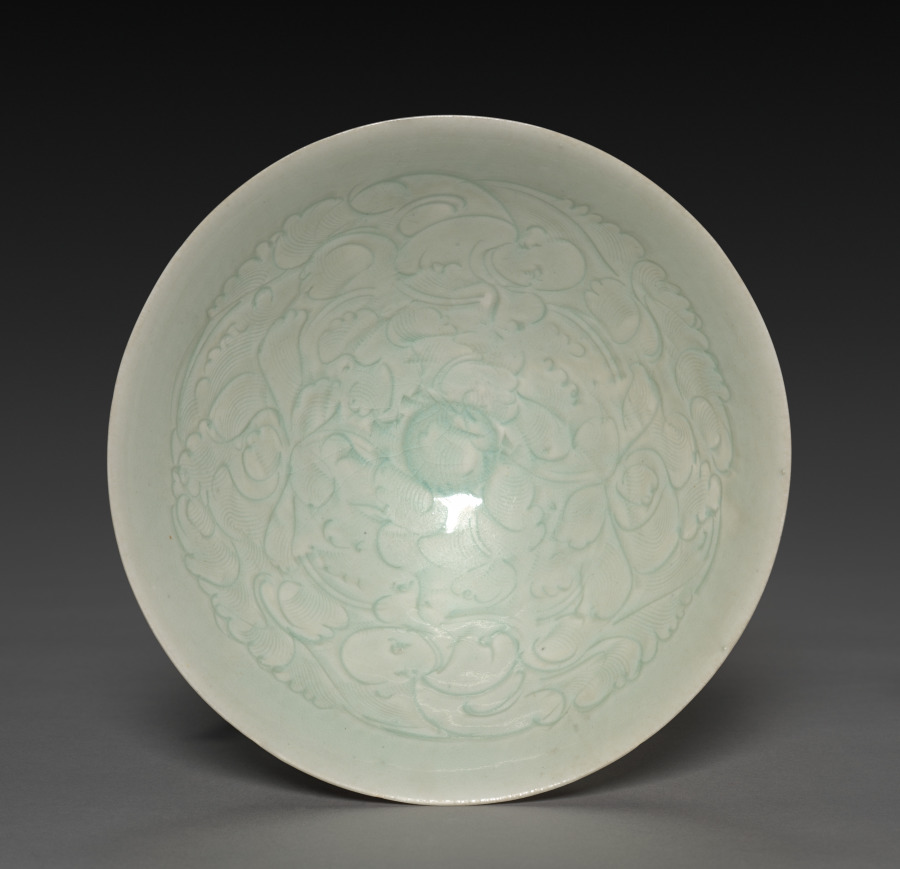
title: Conical Bowl with Carved Babies and Floral Motif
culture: China, Song dynasty (960-1279)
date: 960–1279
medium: Porcelain with pale bluish-white glaze, qingbai ("blue-white") ware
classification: Ceramic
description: The conical shape of this bowl is especially suitable for whipping powdered tea, which became popular at court, in monasteries, and in scholarly elite circles during the Southern Song dynasty. The decoration of this bowl was cut with a wooden instrument into the dried clay. This type of white porcelain with a translucent bluish glaze was the direct predecessor of the later blue-and-white porcelains.